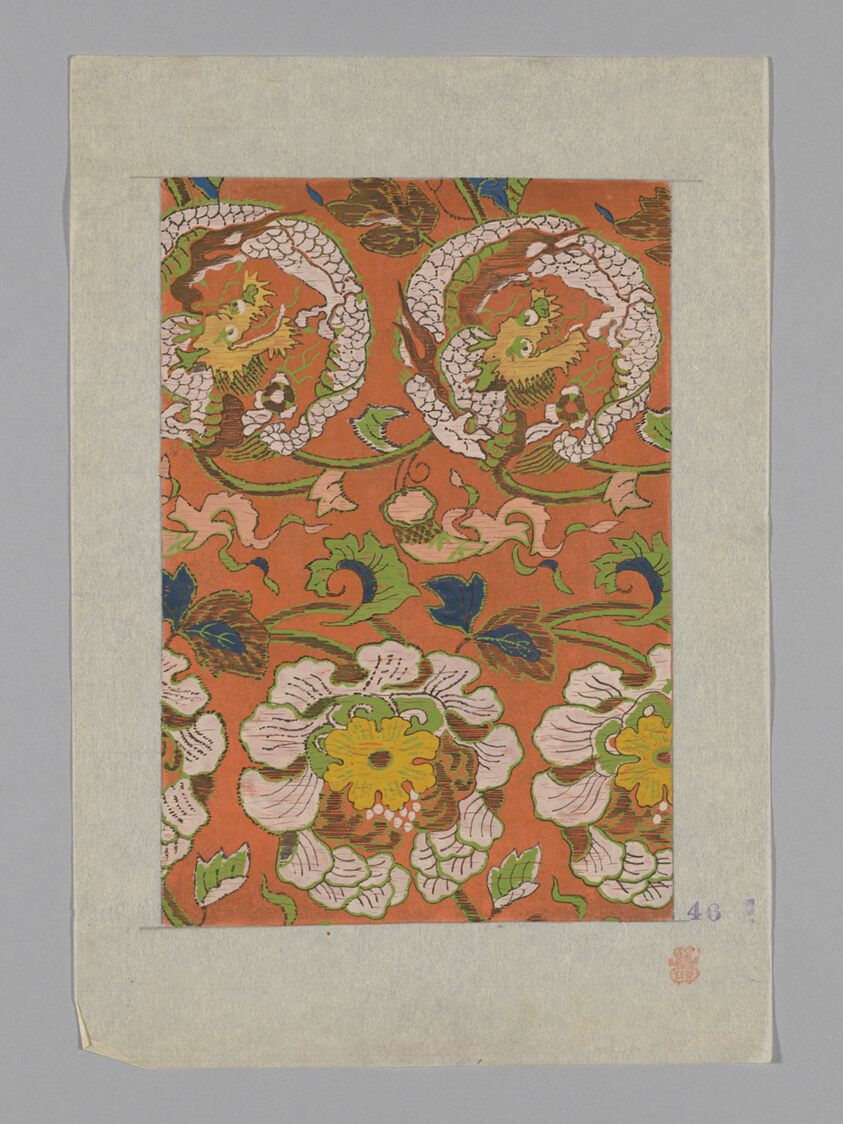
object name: Drawing and Watercolor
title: Design on Paper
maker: Japan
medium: Paper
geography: Japan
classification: textile; accessory - paper design; watercolor; paper